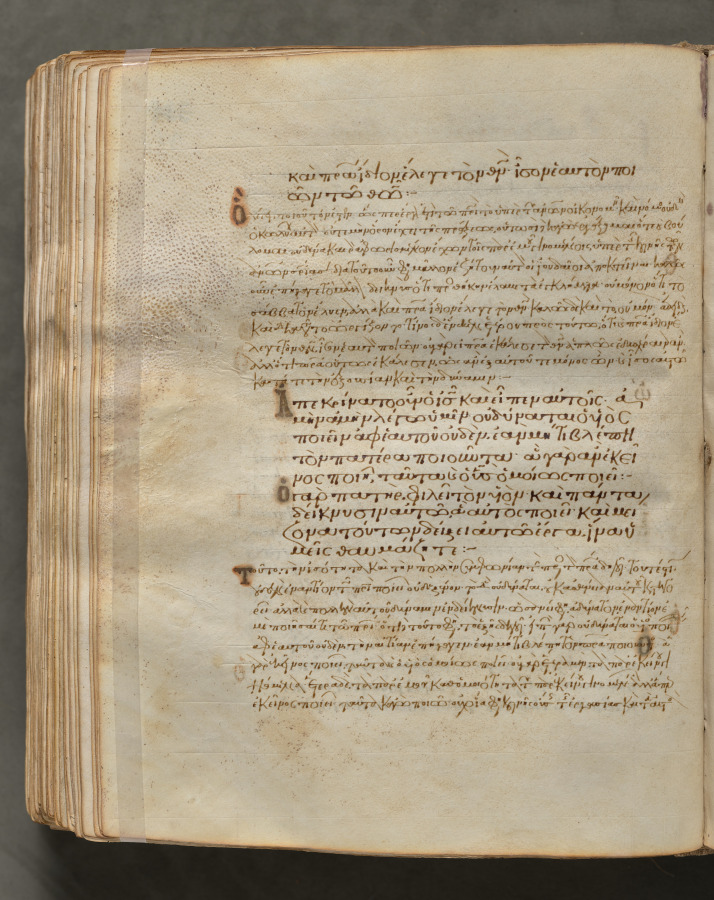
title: Text, folio 344 (verso), from a Gospel Book with Commentaries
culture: Byzantium, Constantinople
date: c. 1000–1100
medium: ink, tempera, and gold on vellum; leather binding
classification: Bound Volume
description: Each of the four gospels in this book opens on a page with brilliantly illuminated borders depicting the author of the text as well as birds—principally peacocks, symbols of the immortality of the soul—and fountains, representing the fountain of life and the salvation of the soul. This volume consists of 428 leaves with texts in Greek. Its level of sophistication suggests that it was probably written and decorated in a monastery in Constantinople.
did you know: Gospel books were carried in procession through Byzantine churches.